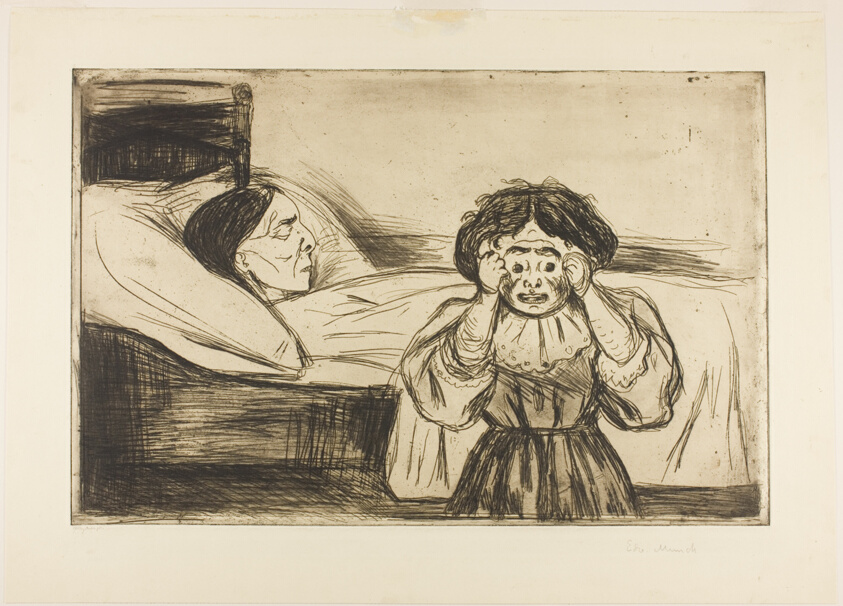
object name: Print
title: The Dead Mother and Her Child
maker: Edvard Munch (Norwegian, 1863-1944); printed by Otto Felsing (German, born 1854)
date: 1901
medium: Etching with open bite and drypoint in black ink on heavyweight cream wove paper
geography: Norway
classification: etching; print; prints and drawing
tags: mothers, children, death